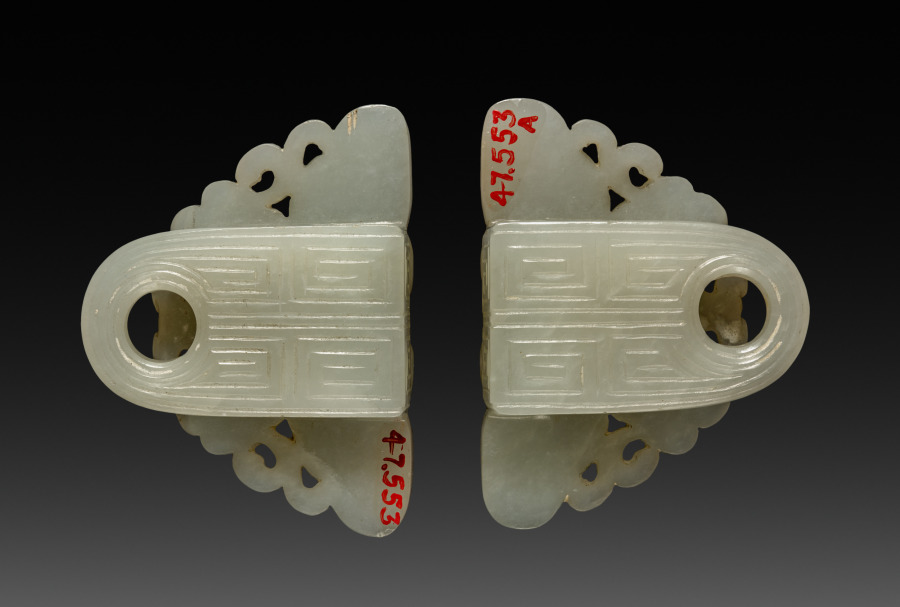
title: Butterfly Buckle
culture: China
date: 1800s–1900s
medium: white jade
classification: Jewelry